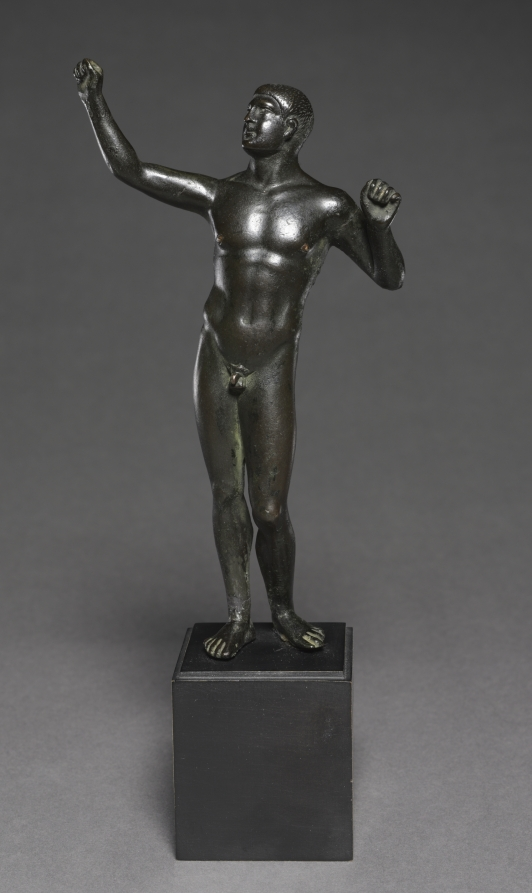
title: Boxer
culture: Greece, Greco-Roman Period, late Ptolemaic Dynasty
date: 100–30 BCE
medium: bronze. solid cast, with copper inlays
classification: Sculpture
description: This boxer raises his arms to pull tight the thongs (now lost) that Greek and Roman boxers wound around their hands for protection. The sinuous body curve and long proportions are characteristic of the late Hellenistic period, when artists created more elongated versions of athletes and other classical figures.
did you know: The long topknot (cirrus) identifies this athlete as a hand-to-hand fighter, most likely a boxer.